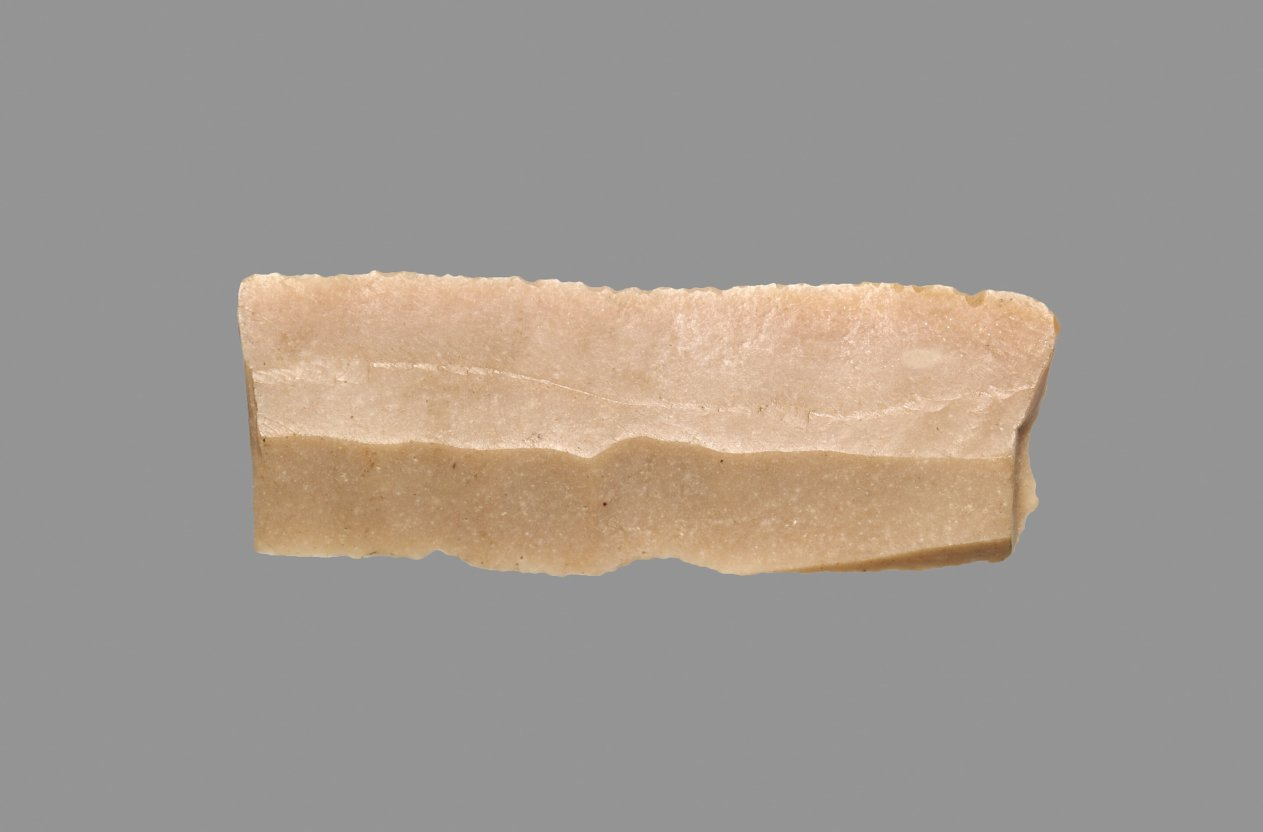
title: Sickle Blade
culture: Egypt, Middle Kingdom (2040–1648 BCE), Dynasty 12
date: 1980–1801 BCE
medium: flint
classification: Implements